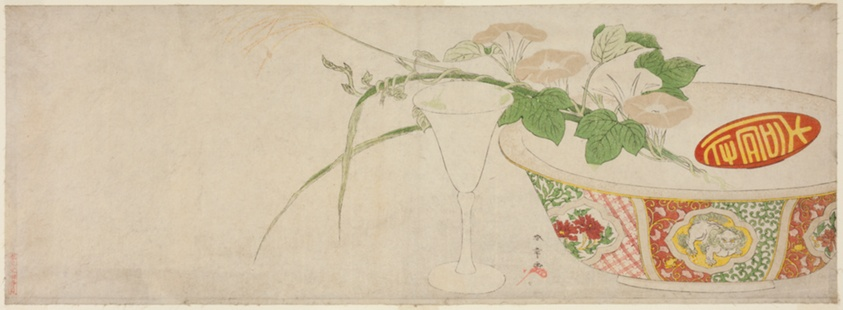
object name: Print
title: Plants, Porcelain Bowl, and Glass Goblet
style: Japanese (culture or style)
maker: Katsukawa Shunsho 勝川 春章; Japanese, 1726-1792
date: c. 1789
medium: Color woodblock print; long surimono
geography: Japan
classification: woodblock print; print; asian art